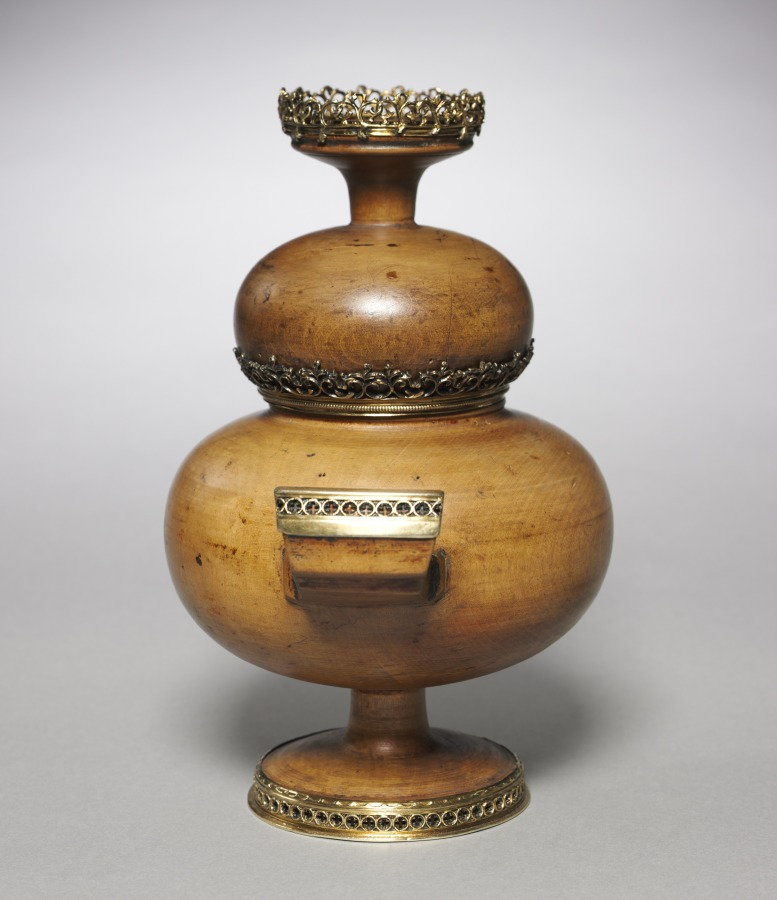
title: Double Cup (Mazer)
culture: Germany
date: c. 1530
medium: maple wood with gilt-silver mounts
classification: Wood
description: A characteristic form of drinking vessel made of close-grained wood, especially maple, was developed in Germany as early as the thirteenth century. It consisted of a larger cup with a foot and a handle and a smaller cup on top. The upper one served as a lid but could also be removed and used as a separate drinking vessel. In this example the smaller upper cup is inset with a memorial portrait medallion of Albrecht Dürer made in the year of his death, 1528. The medal is the work of Matthes Gebel who was active in Nuremberg and Augsburg as a medallist from 1523 to his death in 1574. The reverse of the medal is set into the base of the larger lower cup.